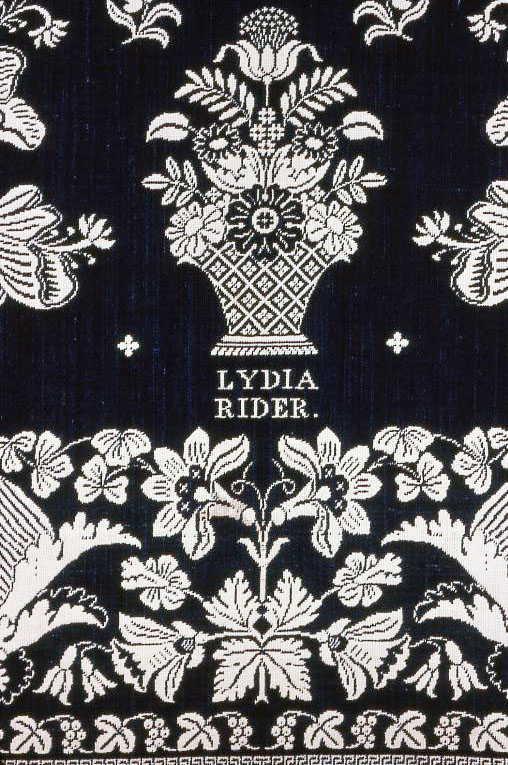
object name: Textile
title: Coverlet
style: 19th century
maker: United States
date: c. 1850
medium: Cotton and wool, plain weave double cloth with main warp fringe; probably woven on loom with Jacquard attachment; two selvages present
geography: United States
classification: weaving - coverlet; coverlet; textile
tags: floral motifs, flora, cornucopia, grapevine, coverlet